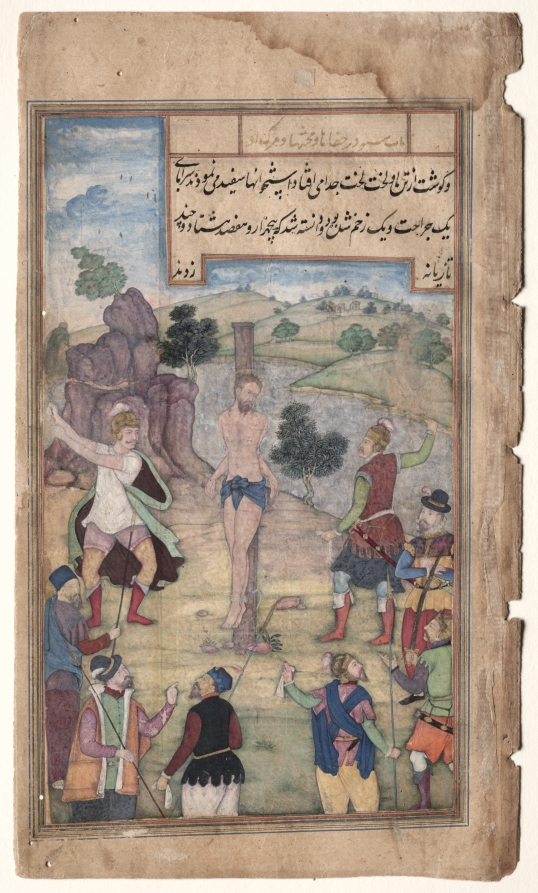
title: The Flagellation (folio 182 recto), from a Mirror of Holiness (Mir’at al-quds) of Father Jerome Xavier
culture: Mughal India, Allahabad, made for Prince Salim (1569–1627)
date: 1602–4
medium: Gum tempera, ink, color, and gold on paper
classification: Manuscript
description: Two Romans flog Jesus, who has been bound to a stake at the center of the circular composition made up of soldiers and the hilly horizon. His subtly articulated expression conveys both pain and compassion, as he endures cuts to his flesh and the bindings around his elbows that secure him so tightly to the post that his feet are elevated off the ground. This is the last illustration in the Cleveland manuscript of the Mirror of Holiness. The Crucifixion was never illustrated, possibly because the patron, Prince Salim, was Muslim. According to the Koran, Jesus did not die on the cross, but was absorbed into heaven by Allah.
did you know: A halo encircles Jesus’s head, and his hair and beard are highlighted with gold.